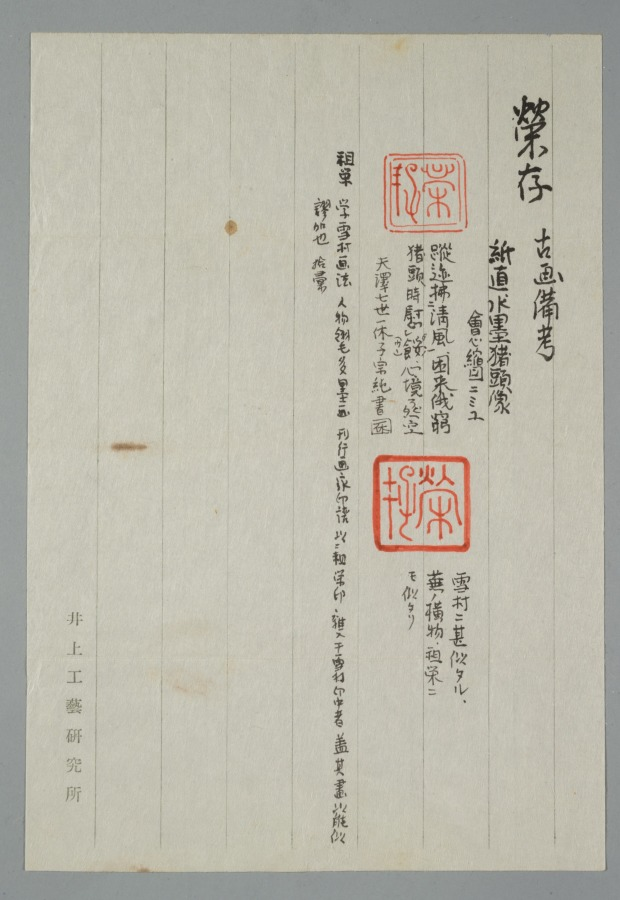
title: Wagtails and Narcissus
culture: Japan, Muromachi period (1392–1573)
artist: Eison (Japanese)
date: mid-1500s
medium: hanging scroll; ink on paper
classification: Painting